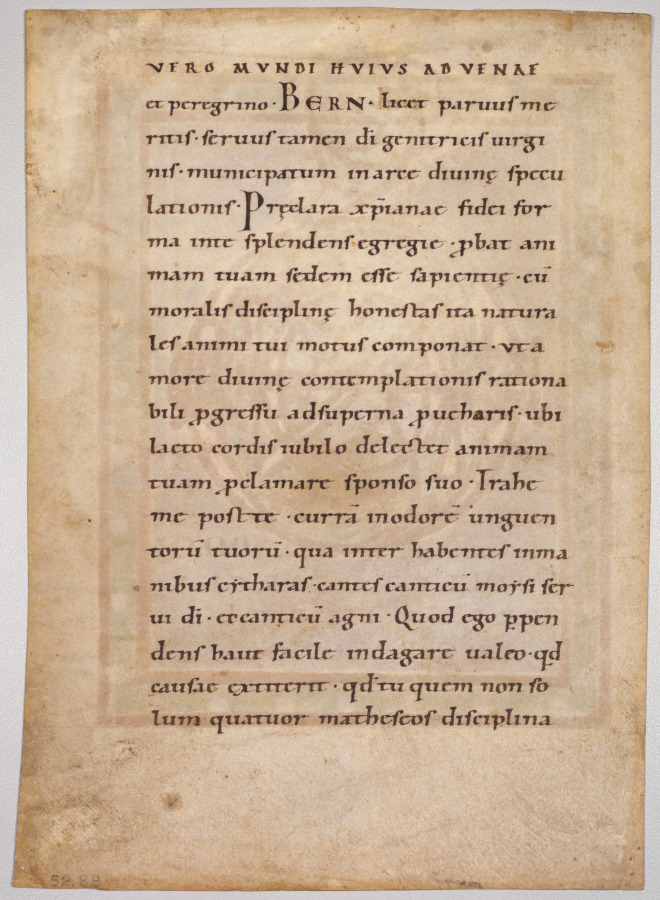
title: Title Page of Abbot Berno's "Tonarius:" Initial D[omino]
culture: Germany, Abbey of Reichenau, 11th century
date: c.1030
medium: ink, tempera, and gold on vellum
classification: Manuscript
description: This leaf originally served as the dedication page of the Tonarius, or Tonary, written by Reichenau's Abbot Berno (1008-1048). A tonary was a music manual used to regulate liturgical chants. Berno's manuscript was presented to Archbishop Pilgrim of Cologne (1021-1036) whose name appears at the bottom of this leaf.